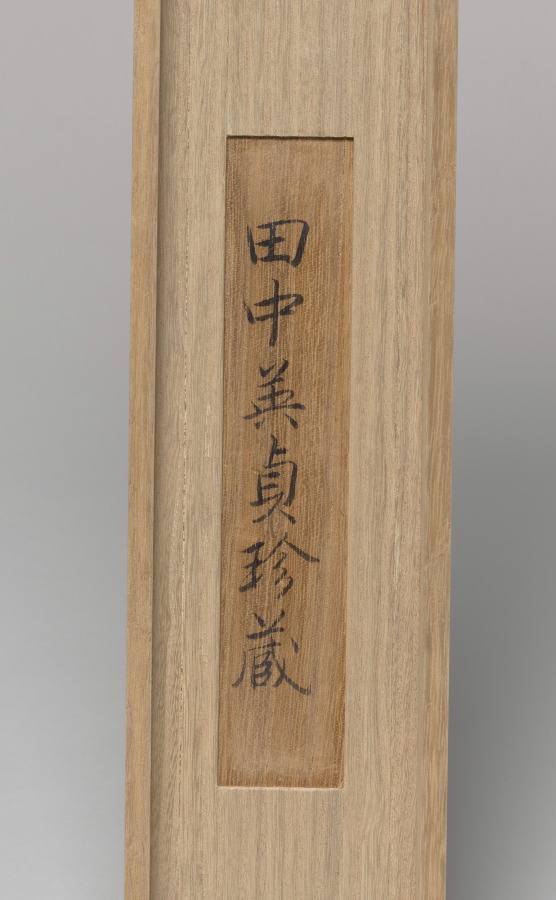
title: Orchid Pavilion Gathering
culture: Japan, Edo period (1615–1868)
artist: Soga Shōhaku (Japanese, 1730–1781)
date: 1777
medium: hanging scroll; ink on silk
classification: Painting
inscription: Inscribed upper right: Sixth year of An'ei (1777) mid-winter, Soga Shohaku Seal: Dasokken Shohaku Seal: Unread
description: This painting depicts a famous gathering that took place in China in AD 353 to celebrate the Spring Purification Festival, also known as the Double Third Festival, as it takes place on the third day of the third lunar month. The host invited everyone to the Orchid Pavilion to compose poetry and drink wine. Guests floated wine cups down a nearby creek, and where they landed, people had to drink the wine and compose a poem.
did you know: The Buddhist temple Bairinji in Kurume City, Fukuoka prefecture, Japan, and the National Gallery of Victoria in Melbourne, Australia, own compositions by the same artist on the same theme.